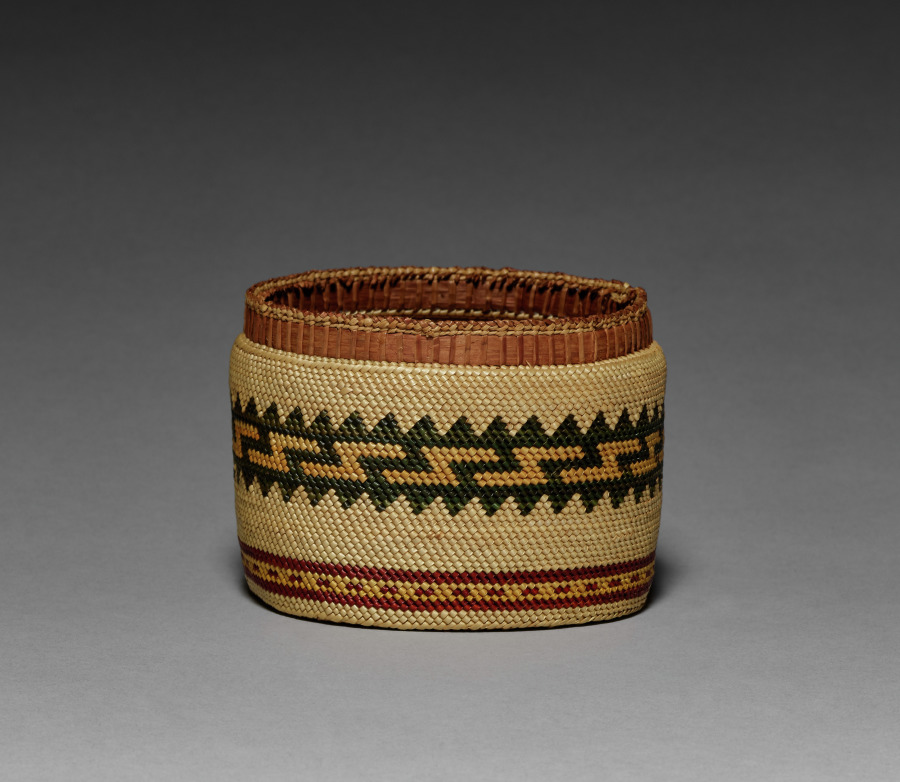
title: Bowl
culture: Northwest Coast, Washington, Makah, late 19th-early 20th century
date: c. 1875–1925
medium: twined grasses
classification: Basketry